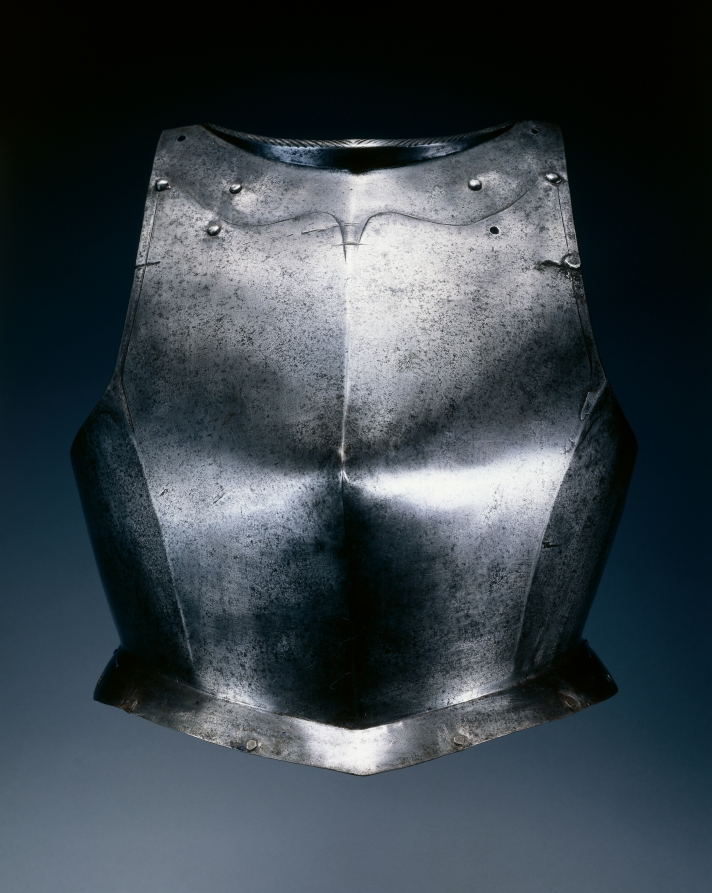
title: Gothic Breastplate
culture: Germany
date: c. 1540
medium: steel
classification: Arms and Armor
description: A breastplate is an element of armor that protects the chest and abdomen; it would have been worn with a now missing backplate. Nuremburg was one of the chief armor production centers and gained international renown; armor produced there was exported throughout Europe. It was not a coincidence that Nuremburg was known for its armor. The ore available in the region made Nuremburg an iron producing center close to the raw material needed to make a better quality and reliable product.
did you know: If you are looking for this in the armor court make sure to look up; it is displayed as part of a panoply, or display with other arms.